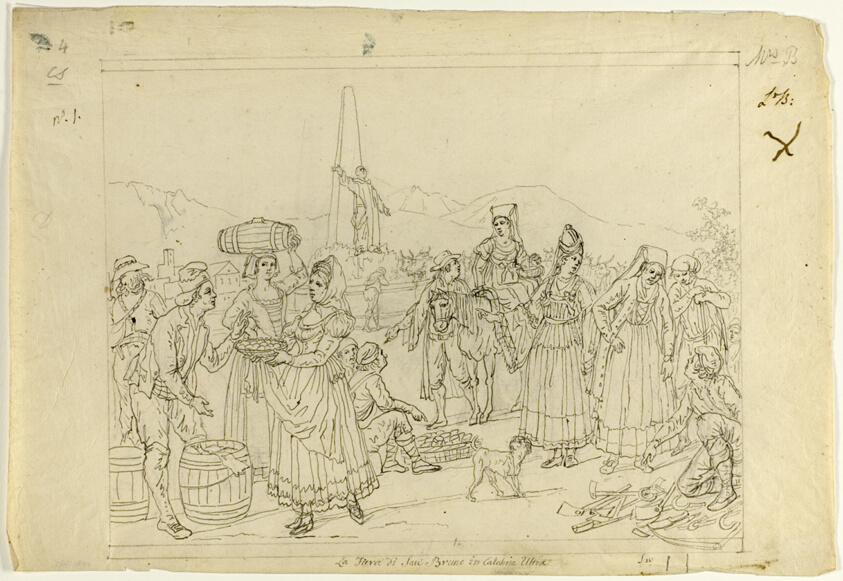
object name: Drawing and Watercolor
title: Market Scene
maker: Saverio della Gatta (Italian, active 1777-1811)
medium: Pen and black ink, over traces of charcoal, on cream laid paper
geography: Italy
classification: pen and ink drawings; drawings (visual works); prints and drawing